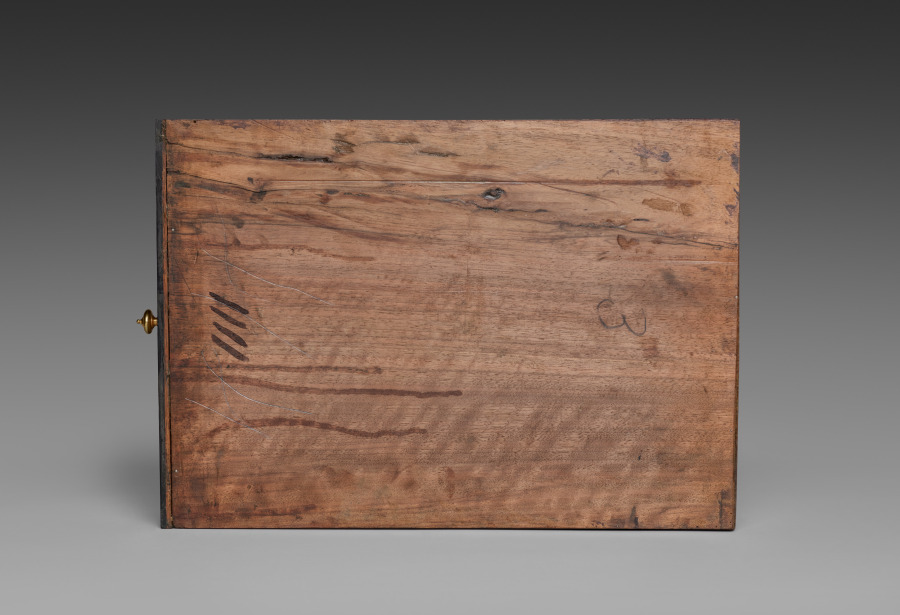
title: Interior Drawer for Cabinet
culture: France, late 17th Century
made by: André-Charles Boulle (French, 1642–1732)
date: c. 1690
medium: ebony, marquetry in metal and tortoiseshell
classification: Furniture and woodwork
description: Appointed cabinetmaker to King Louis XIV in 1672, André-Charles Boulle became a master of furniture making in France during the late 1600s until his death in 1732. Known primarily for his use of marquetry, in which metal patterns are inlaid into tortoiseshell then applied within the veneered surface of the furniture, Boulle established a level of quality and craftsmanship few others could achieve. As a result, his work found favor at the royal court and among other aristocrats and diplomats eager to impress the king. The inclusion of a medallion depicting Louis XIV within the bronze decoration of this chest would have identified the owner with the royal court. Often exhibiting stout architectural proportions with elegant groups of inlaid motifs such as the parrot on the central panel of this chest, Boulle’s designs are an example of the intellectual fashion for contrasting ideas, materials, and motifs.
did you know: Originally designed to sit atop an elaborate tall stand, this chest was likely altered in the late 1700s to reduce its scale and height.